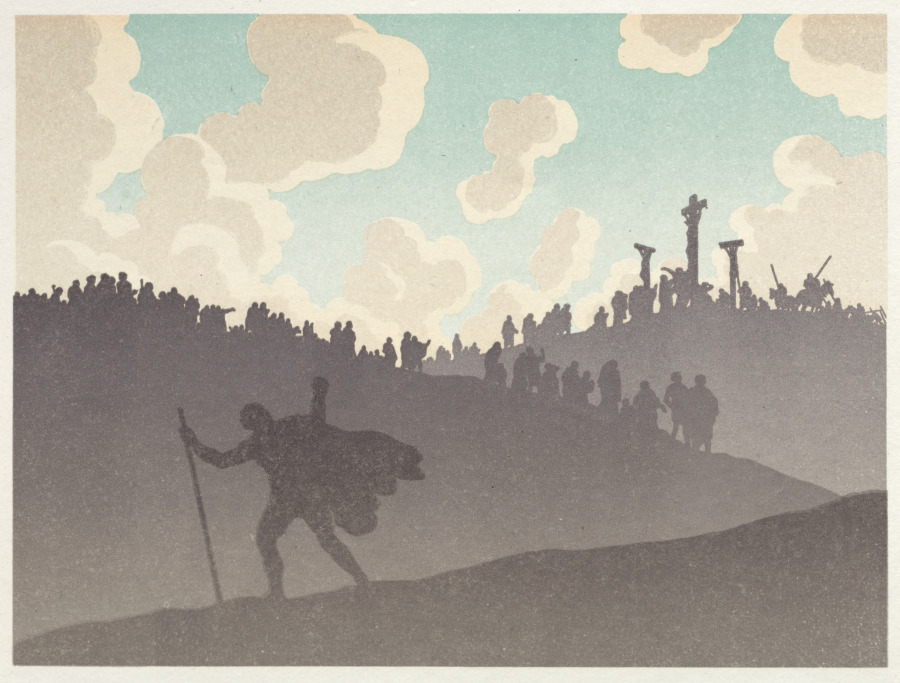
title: The Wandering Jew: The Old City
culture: France, 19th century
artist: Henri Rivière (French, 1864–1951)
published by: Verneau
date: 1896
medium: color lithograph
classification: Portfolio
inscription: title page is signed, in blue crayon: Henri Rivière